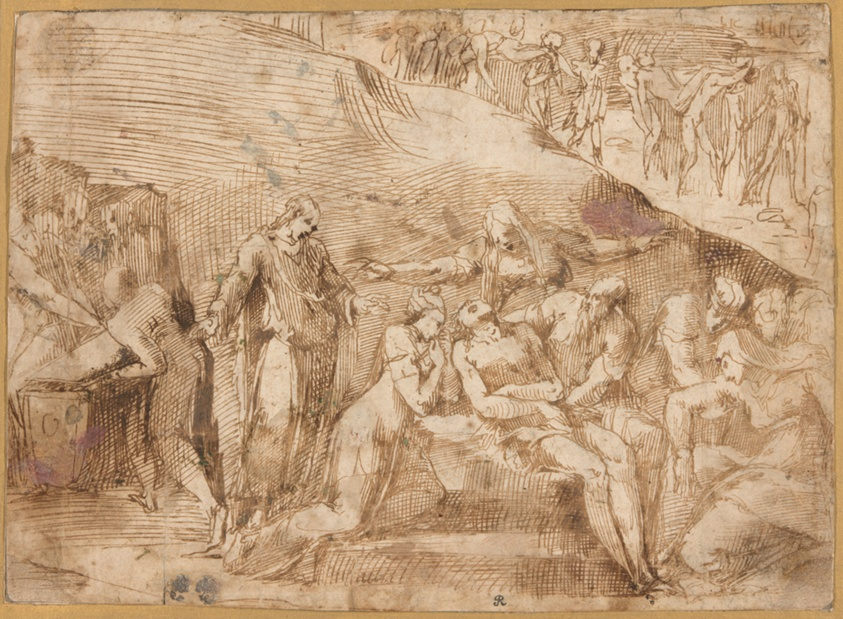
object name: Drawing and Watercolor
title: The Lamentation of Christ (recto and verso)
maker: Polidoro da Caravaggio (Italian, c. 1499–c. 1543)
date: 1527/35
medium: Pen and brown ink, with small splatters of opaque green, gray and pink paint, with touches of white gouache (recto) and pen and brown ink and brush and brown wash (verso) on ivory laid paper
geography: Italy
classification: pen and ink drawings; paper; drawings (visual works); prints and drawing